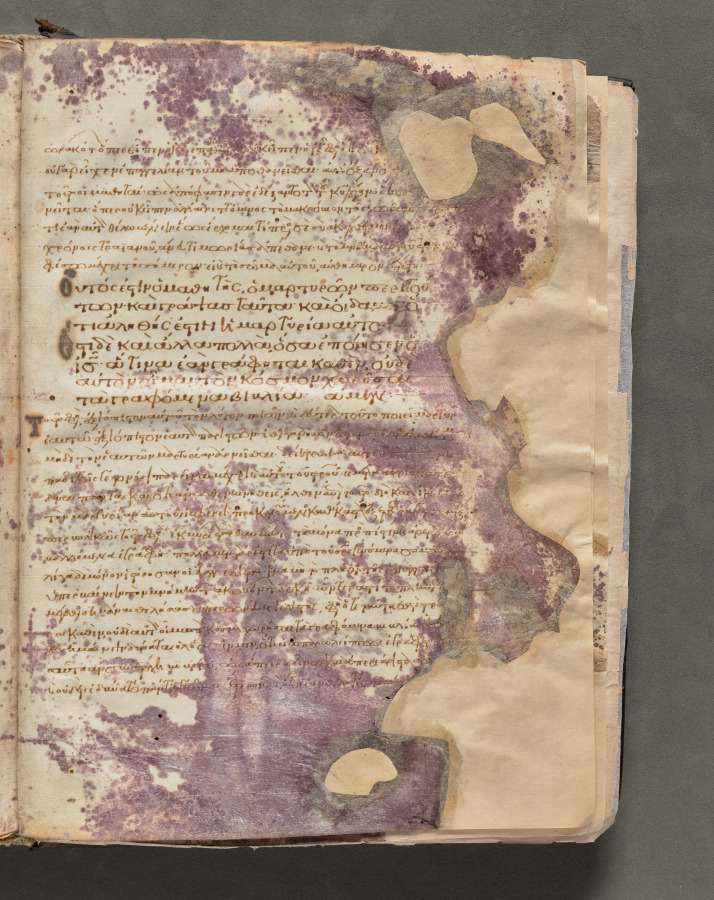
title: Text, folio 425 (recto), from a Gospel Book with Commentaries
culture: Byzantium, Constantinople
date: c. 1000–1100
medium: ink, tempera, and gold on vellum; leather binding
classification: Bound Volume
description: Each of the four gospels in this book opens on a page with brilliantly illuminated borders depicting the author of the text as well as birds—principally peacocks, symbols of the immortality of the soul—and fountains, representing the fountain of life and the salvation of the soul. This volume consists of 428 leaves with texts in Greek. Its level of sophistication suggests that it was probably written and decorated in a monastery in Constantinople.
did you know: Gospel books were carried in procession through Byzantine churches.